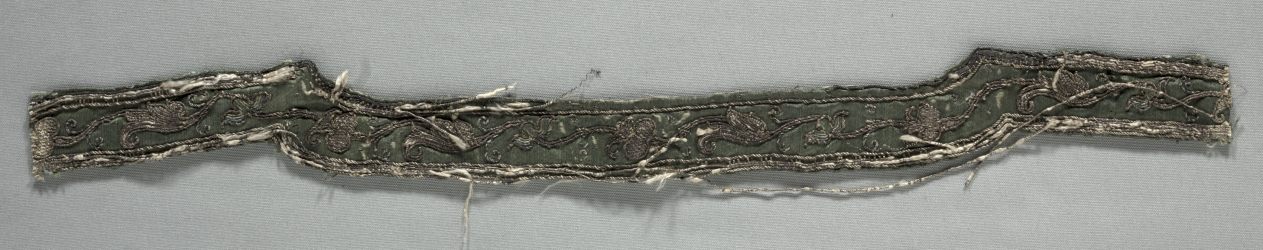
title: Apparel from a Dalmatic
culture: Italy, early 16th century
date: early 1500s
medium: embroidery; silk and metallic threads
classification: Embroidery